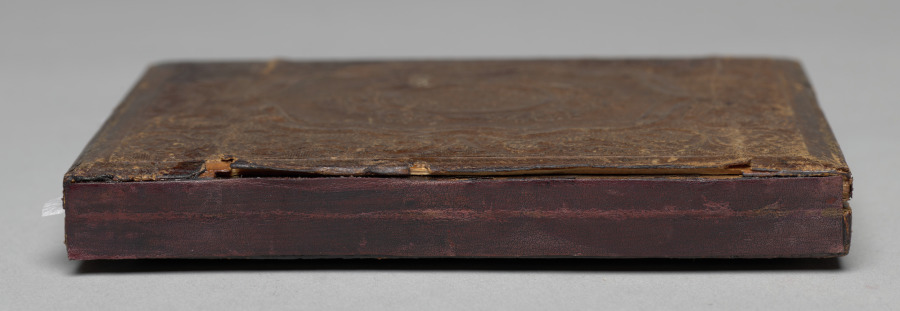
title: Homestead with picket fence and flowers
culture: America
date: c. 1857–65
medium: ambrotype, half plate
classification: Photograph